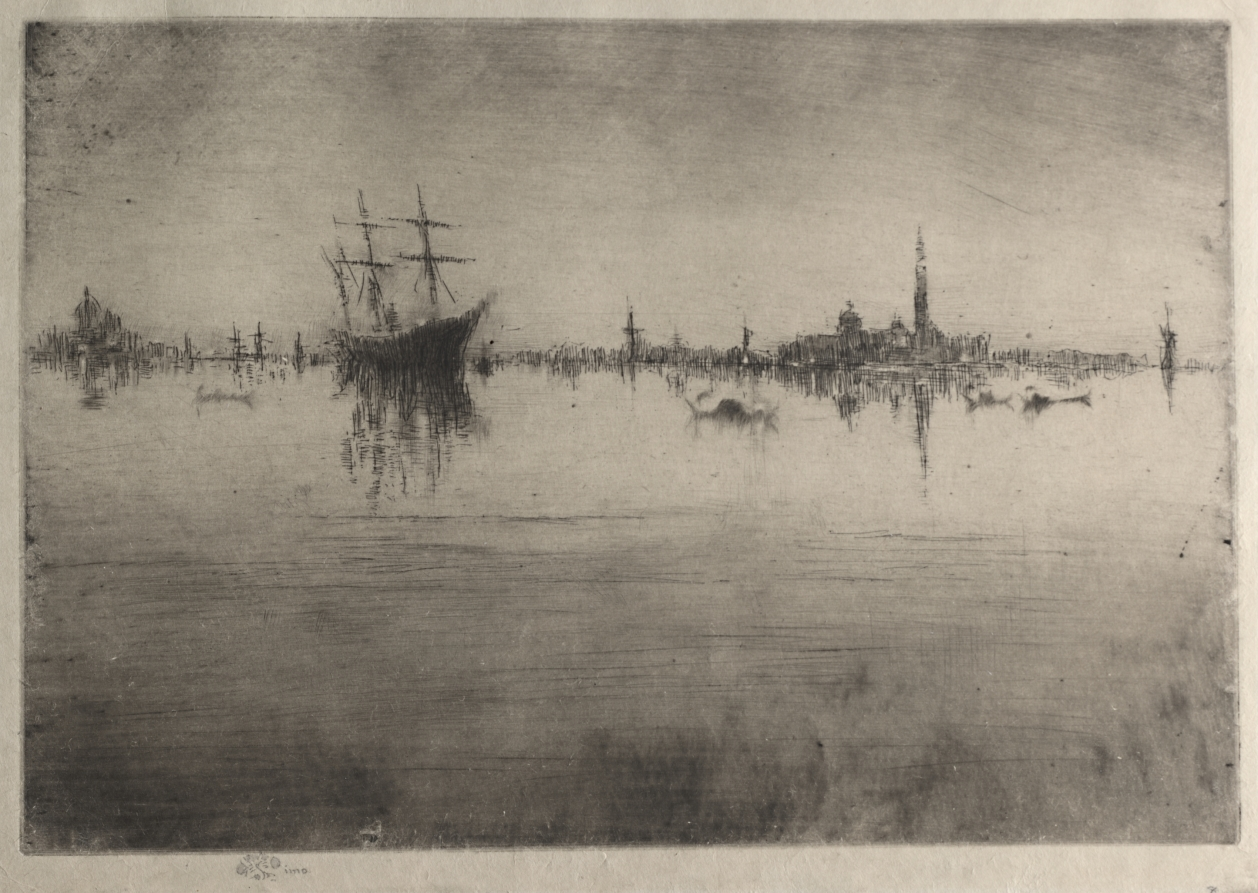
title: Nocturne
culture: America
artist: James McNeill Whistler (American, 1834–1903)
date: 1880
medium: etching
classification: Print